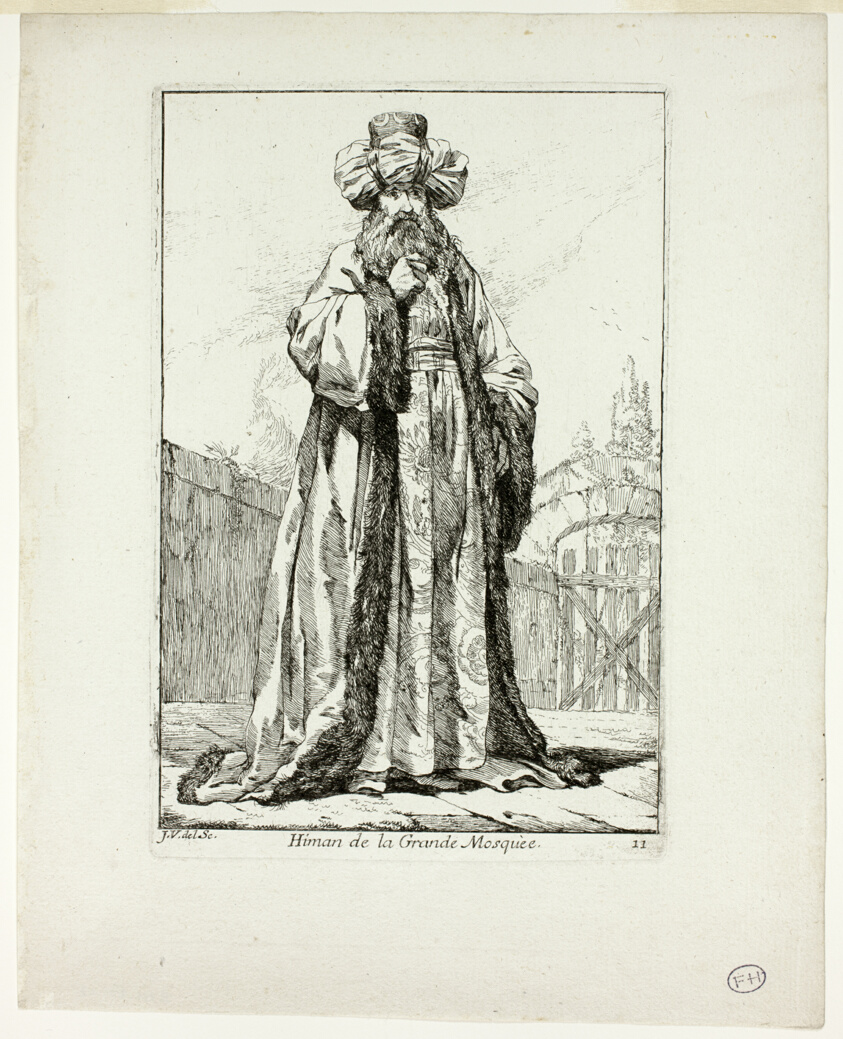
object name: Print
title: Himan de la Grand Mosquèe, plate eleven from Caravanne du Sultan à la Mecque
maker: Joseph-Marie Vien, the elder; French, 1716–1809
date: 1748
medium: Etching on ivory laid paper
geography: France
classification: etching; paper; print; prints and drawing